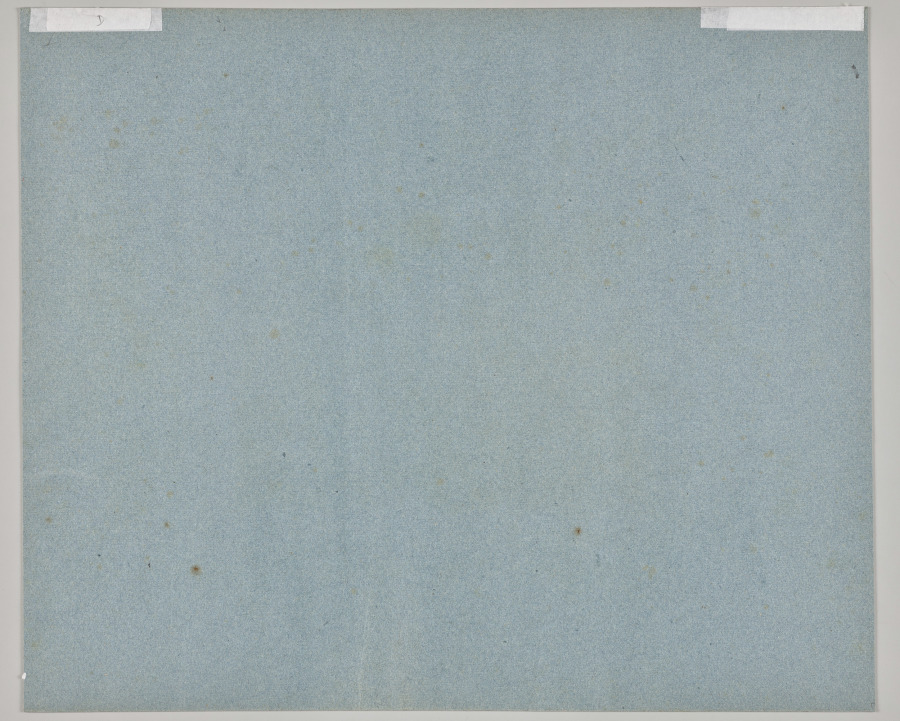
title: Thursday. Berchtesgaden and the Watzmann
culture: Germany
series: Seven Areas from Salzburg and Berchtesgaden. Arranged according to the seven days of the week, connected by two allegorical sheets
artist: Ferdinand Olivier (German, 1785–1841)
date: 1818–23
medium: lithograph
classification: Print